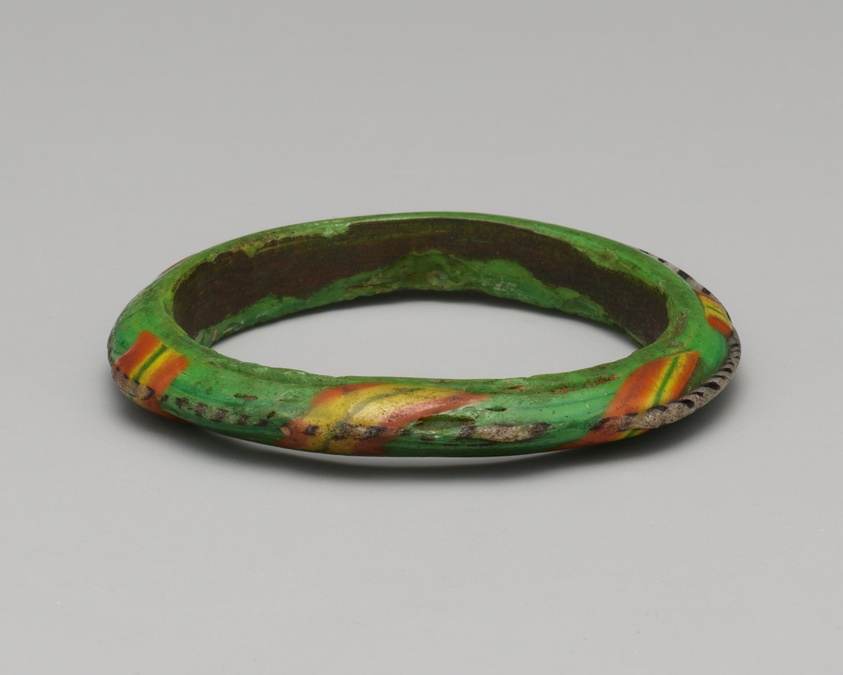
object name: Costume and Accessories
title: Bracelet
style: greco-roman (egyptian)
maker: Islamic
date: 14th-15th century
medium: Glass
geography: Egypt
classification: glass; jewelry; ancient art; costume